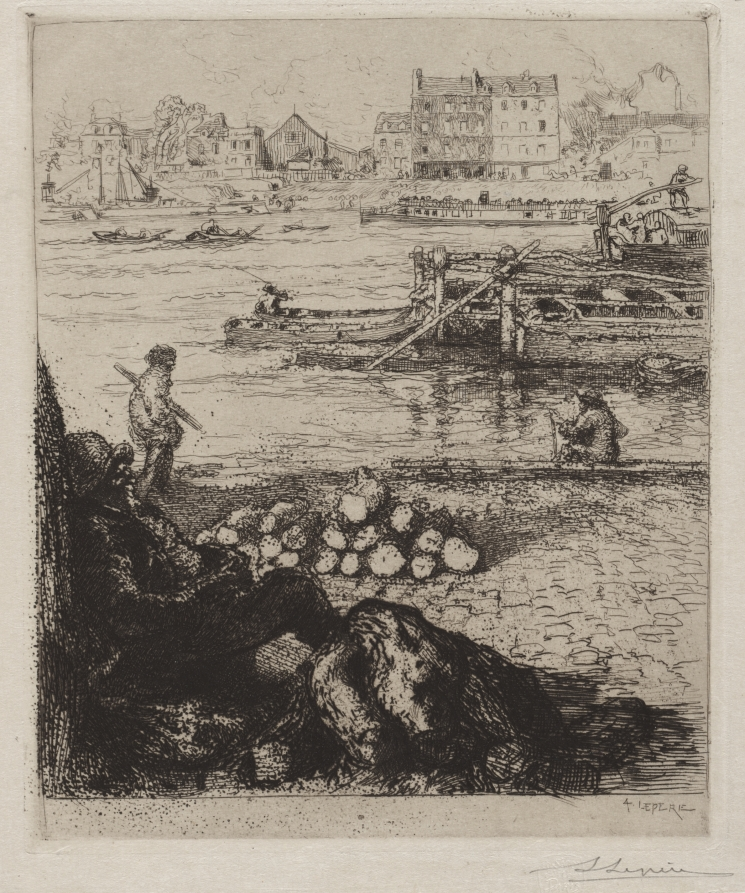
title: Le Débardeur: Quai de la Gare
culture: France, 19th century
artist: Auguste Louis Lepère (French, 1849–1918)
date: 1894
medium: etching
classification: Print